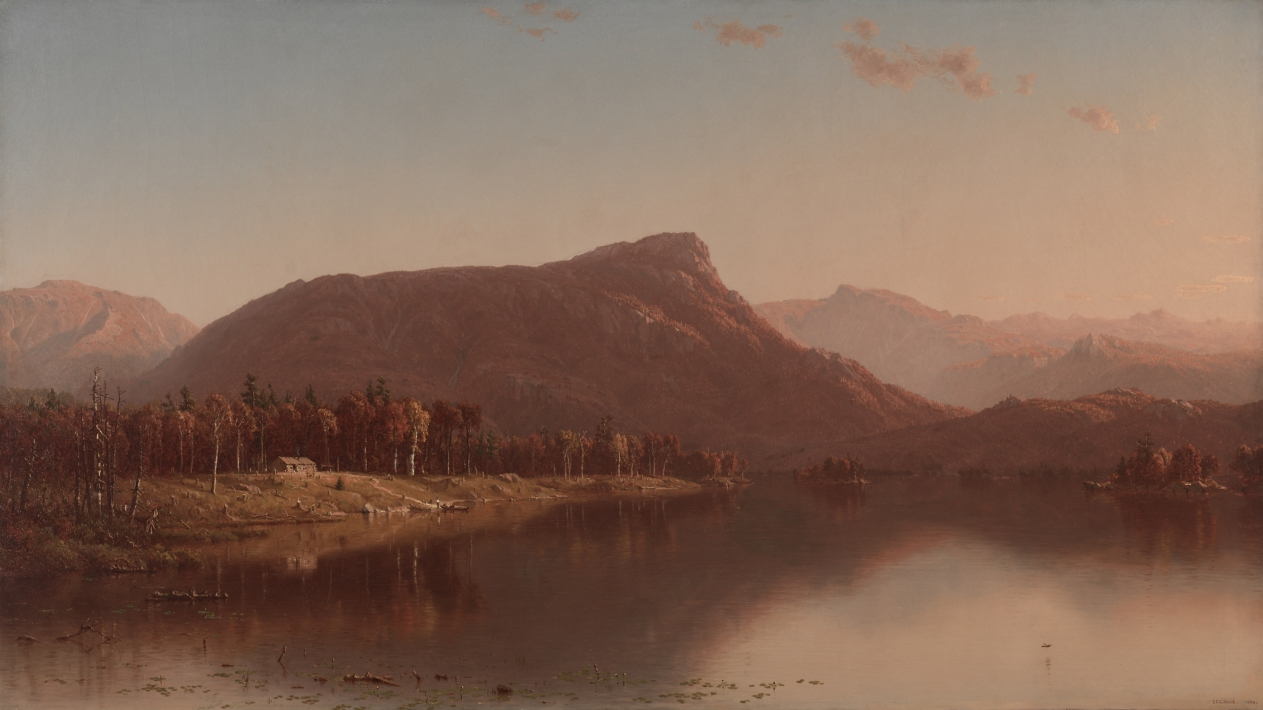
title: A Home in the Wilderness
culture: America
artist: Sanford Robinson Gifford (American, 1823–1880)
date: 1866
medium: oil on canvas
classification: Painting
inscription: Signed lower right: SR Gifford. 1866.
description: Gifford’s view of Mount Hayes in New Hampshire records human intrusion into a remote landscape. On the left riverbank a log cabin stands amid a recently cleared patch of land with several tree stumps, while figures in its doorway greet a man who has arrived with a canoe of supplies.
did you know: Gifford considered this painting to be one of his finest creations.